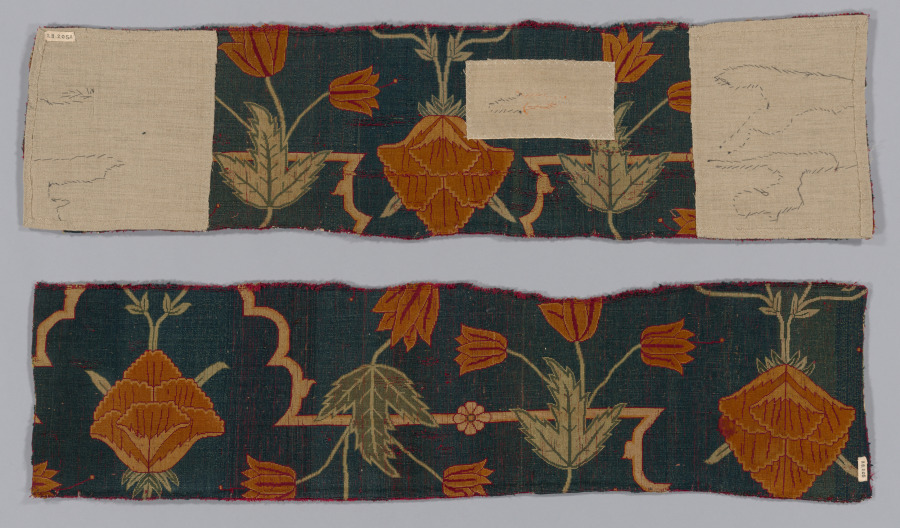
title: Fragments of a Carpet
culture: India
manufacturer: Imperial Manufactory (Indian)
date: 1600–1650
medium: silk and wool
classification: Carpet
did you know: These fragments have a formal floral and palmette design within a trellis pattern.